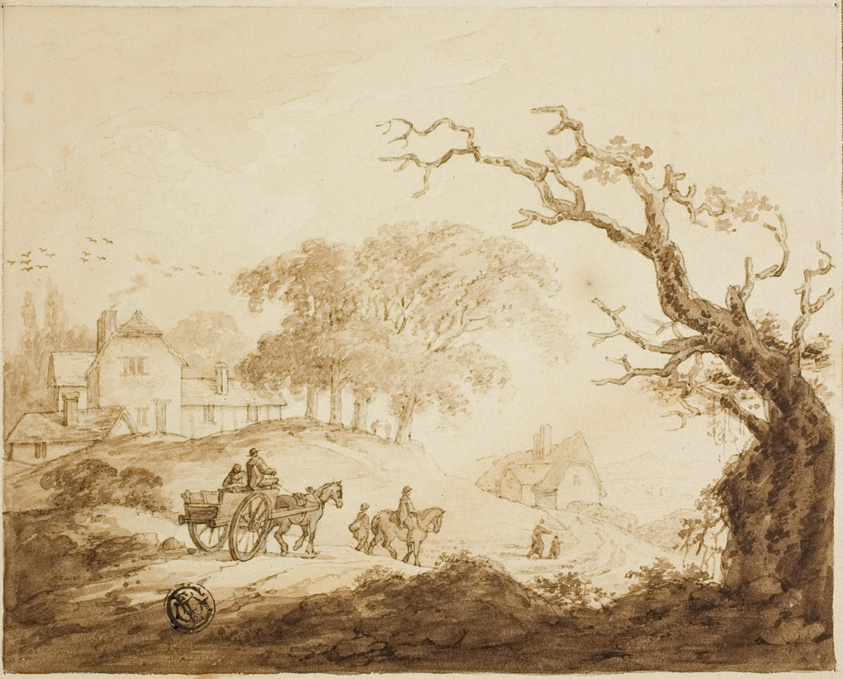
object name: Drawing and Watercolor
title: Travelers with Horses and Cart on a Road Past Houses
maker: Unknown Artist; European, 1800-1899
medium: Brush and brown wash over graphite on cream wove paper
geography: Europe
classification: ink or chalk wash; drawings (visual works); prints and drawing